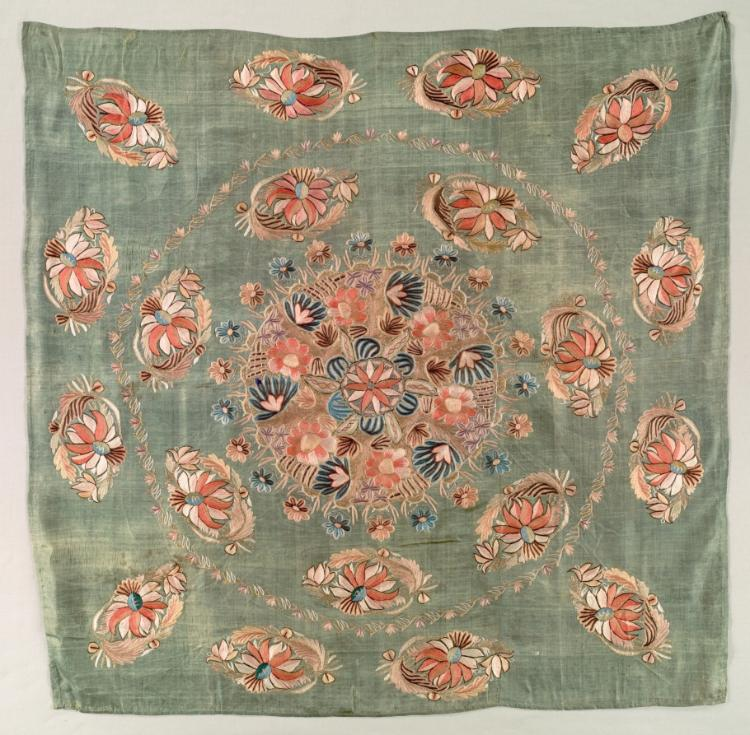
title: Embroidered Square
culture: Turkey, 19th century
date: 19th century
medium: embroidery, silk and metallic threads, on silk tabby ground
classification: Embroidery